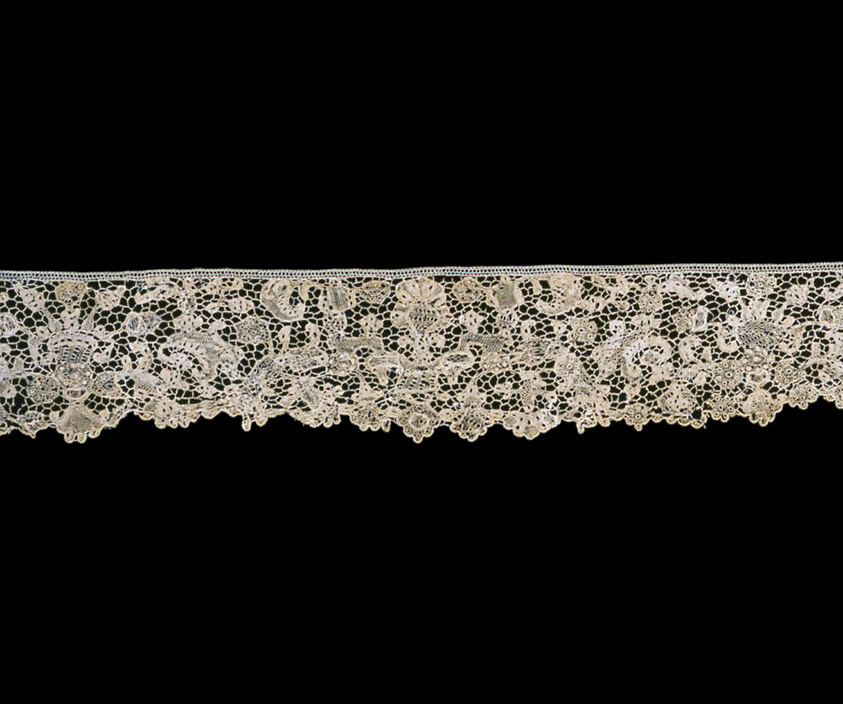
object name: Textile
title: Border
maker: France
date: c. 1700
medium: Linen, needle lace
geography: France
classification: textile; lace - needle